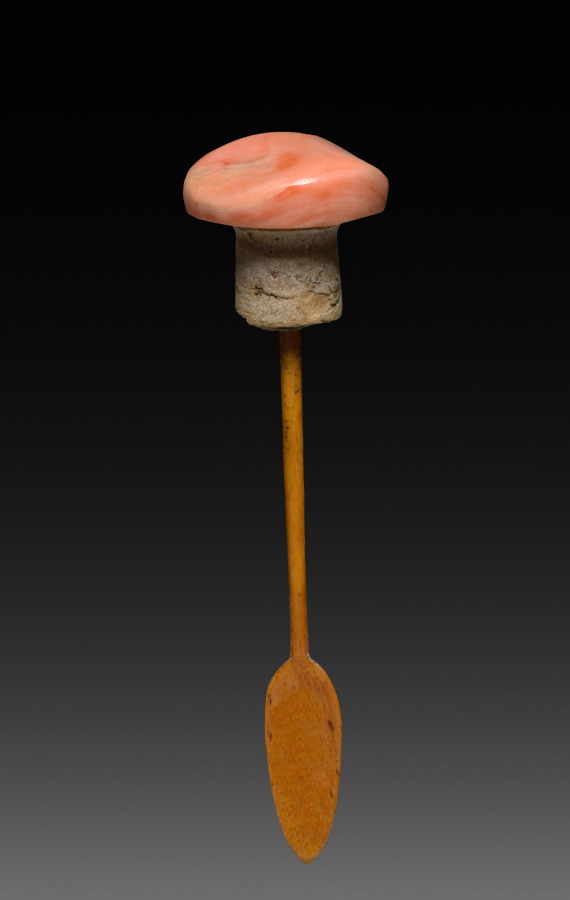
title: Snuff Bottle with Stopper (stopper)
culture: China, Jiangxi province, Jingdezhen kilns, Qing dynasty (1644-1911), Yongzheng mark and reign (1723-35)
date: 1723–35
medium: porcelain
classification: Ceramic